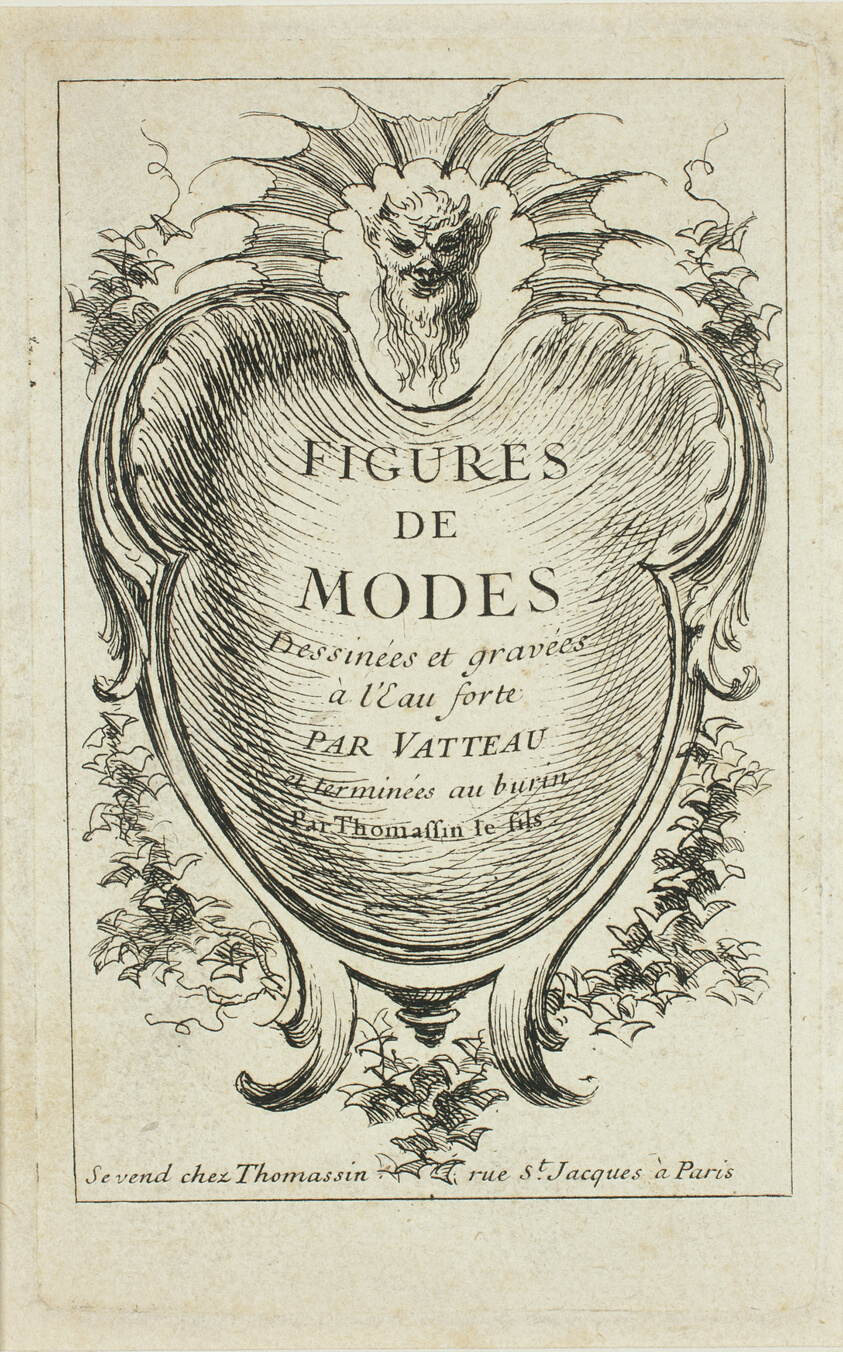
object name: Print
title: Title Page, from Figures de modes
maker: Jean Antoine Watteau (French, 1684-1721)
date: c. 1710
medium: Etching in black on ivory laid paper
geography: France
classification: etching; paper; print; prints and drawing